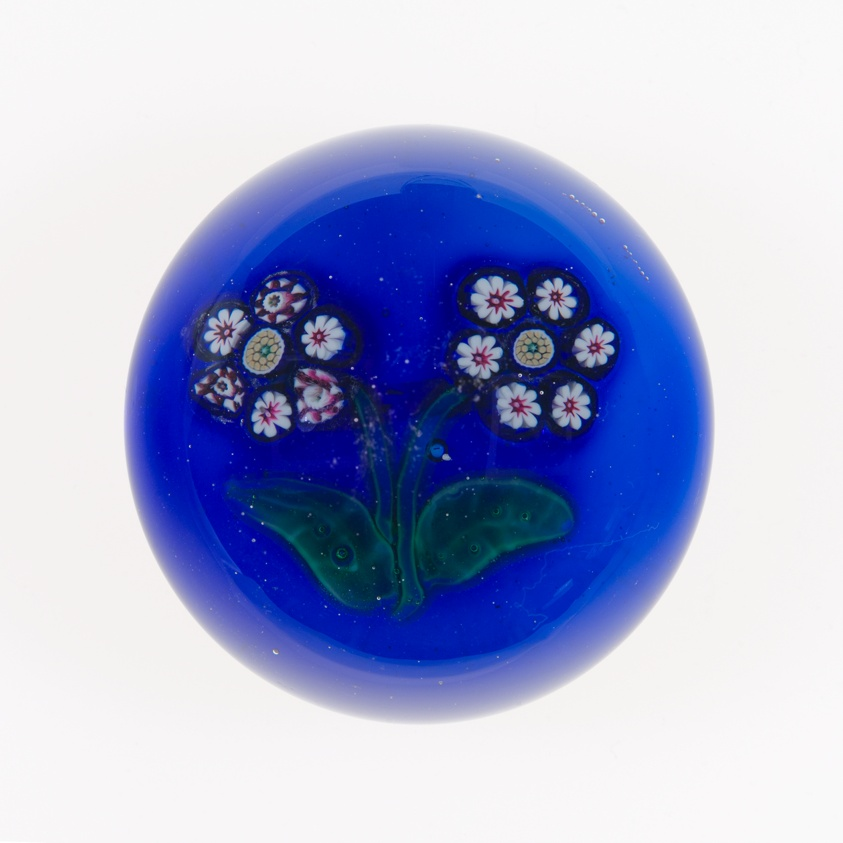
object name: Glass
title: Paperweight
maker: Clichy Glassworks (Cristalleries de Clichy); Clichy, France, 1837-1885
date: c. 1848–55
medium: Glass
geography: Clichy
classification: paperweight; lampwork; european decorative arts; glass